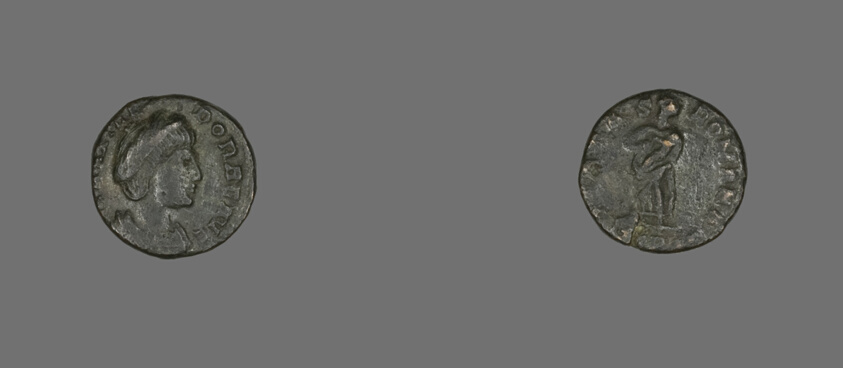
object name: Coin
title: Coin Portraying Empress Theodora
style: imperial (roman), ancient, roman (ancient, style or period)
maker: Roman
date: 292-306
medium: Bronze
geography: Roman Empire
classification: coin; ancient art